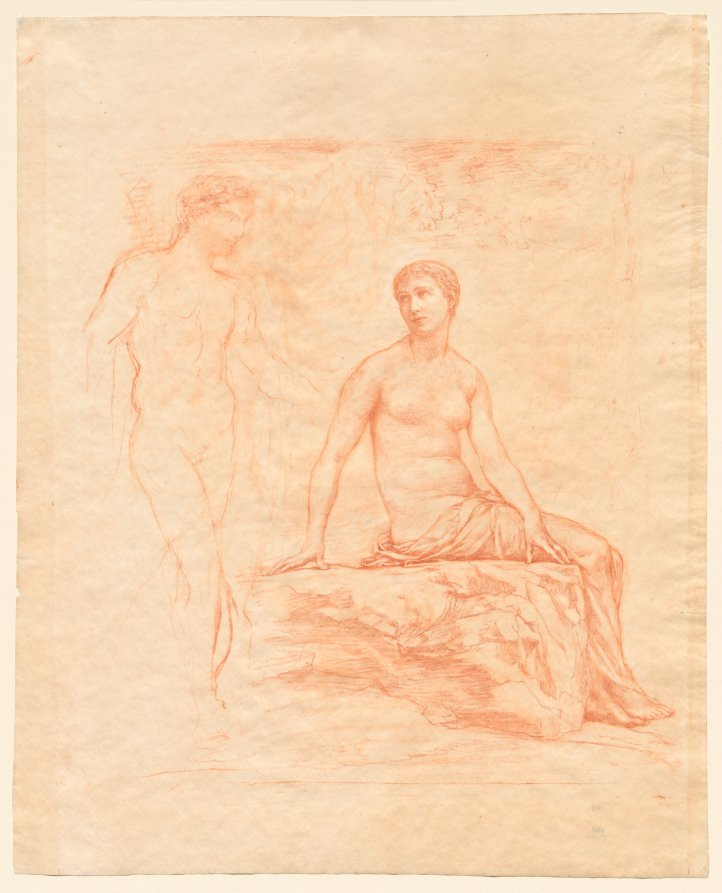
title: Bacchus and Ariadne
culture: America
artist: John La Farge (American, 1835–1910)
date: c. 1880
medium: red chalk (rubbed in places)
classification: Drawing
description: In the early 1880s, John La Farge worked with a team of artists, including the sculptor Augustus Saint-Gaudens (1848–1907), to produce decorations for the home of the American industrialist Cornelius Vanderbilt. La Farge's designs made many allusions to the art of the Italian Renaissance and to the splendid decorations created for the Medici banking family in Florence. In this drawing he used a medium common in Italian drawings—red chalk—in self-conscious emulation of Renaissance practice.